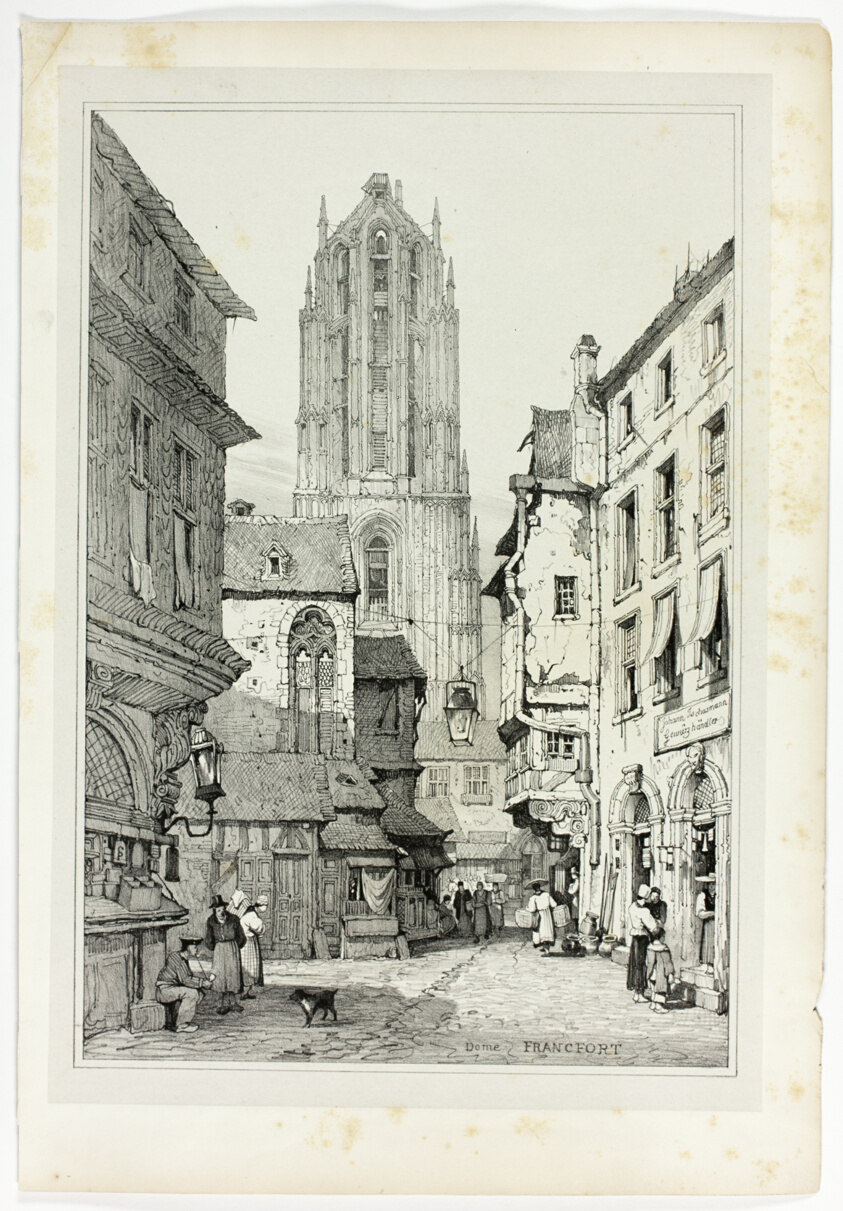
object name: Print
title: Dome, Francfort, from Facsimiles of Sketches made in Flanders and Germany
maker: Samuel Prout (English, 1783-1852); printed by Charles Joseph Hullmandel (English, 1789-1850)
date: 1833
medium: Lithograph in black on grayish-ivory chine, laid down on ivory wove paper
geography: England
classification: lithograph; print; prints and drawing